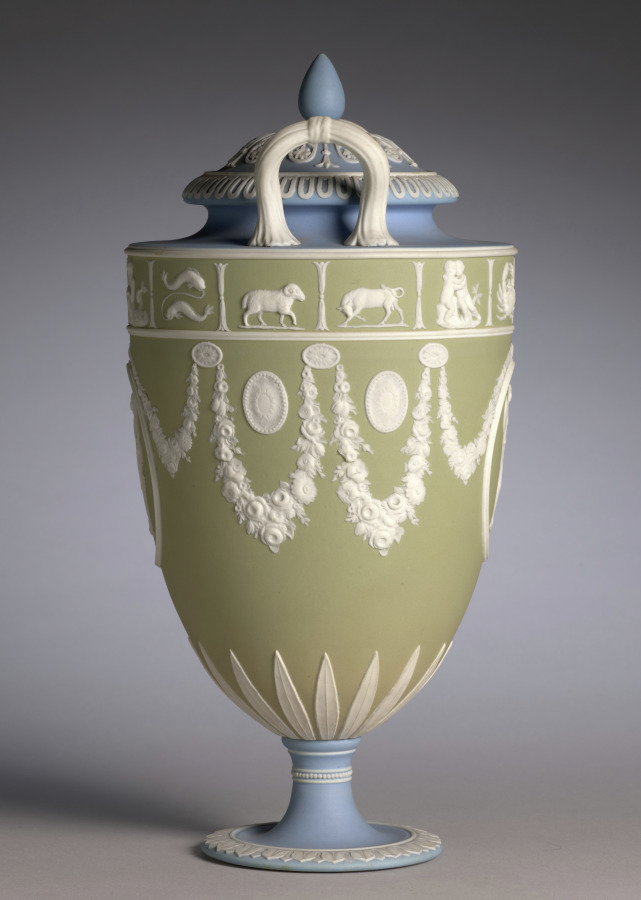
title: Covered Vase (one of a pair)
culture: England, Staffordshire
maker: Josiah Wedgwood and Sons (British, Staffordshire, est. 1759)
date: c. 1850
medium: jasper ware with relief decoration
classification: Ceramic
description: Wedgwood's tricolor jasperware first became popular in the 1770s during a period of fascination with neoclassical decoration. This vase was probably made around 1850 during the period when this type of decoration was revived. The relief medallions depict two versions of the Greek god Apollo, the god of music, next to his harp or lyre.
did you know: Signs of the zodiac form a decorative border around the upper portion of this vase.